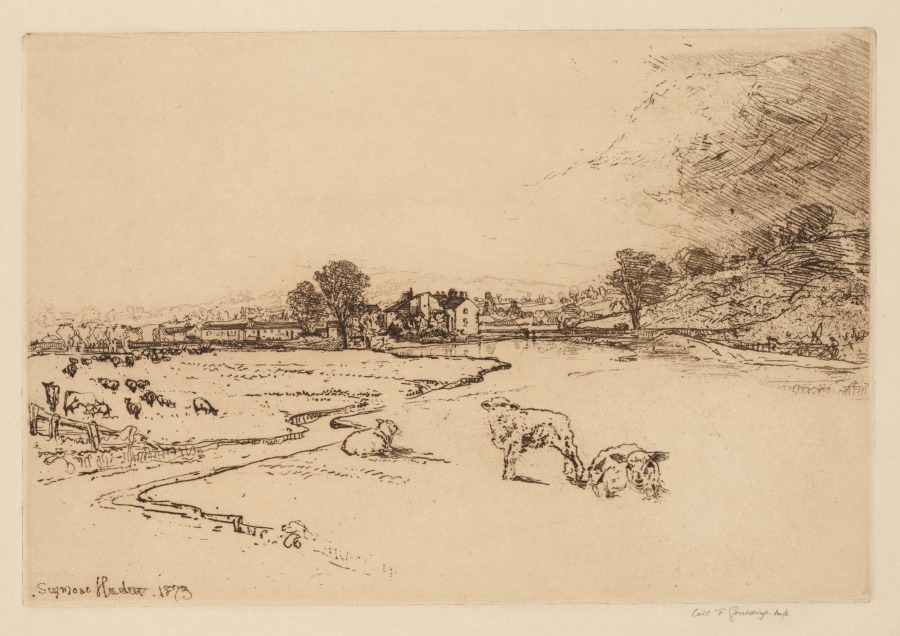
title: Sawley Abbey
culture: Britain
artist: Francis Seymour Haden (British, 1818–1910)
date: 1873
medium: etching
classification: Print